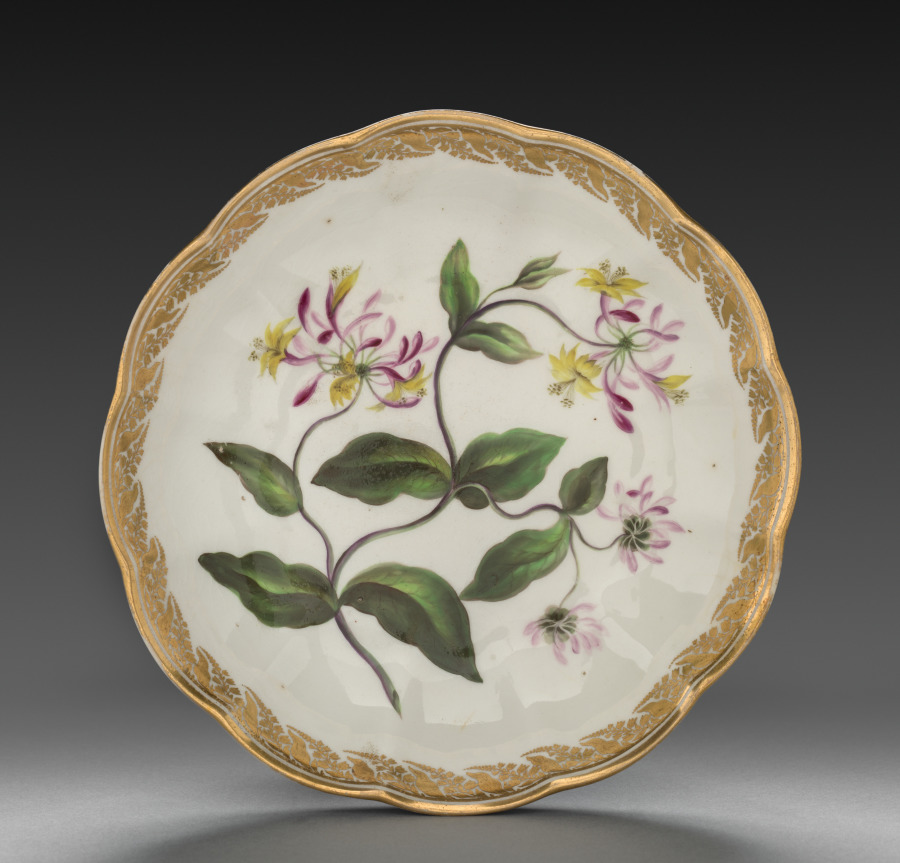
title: Bowl from Dessert Service: Dutch Honeysuckle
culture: England, Derby, 18th century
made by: Derby (Crown Derby Period) (British)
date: c. 1800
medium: porcelain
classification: Ceramic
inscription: inscribed in blue on back: Lonicera Bataviana./Dutch Honeysuckle./crown/crossed batons and dots/D/115. Near edge: 9.